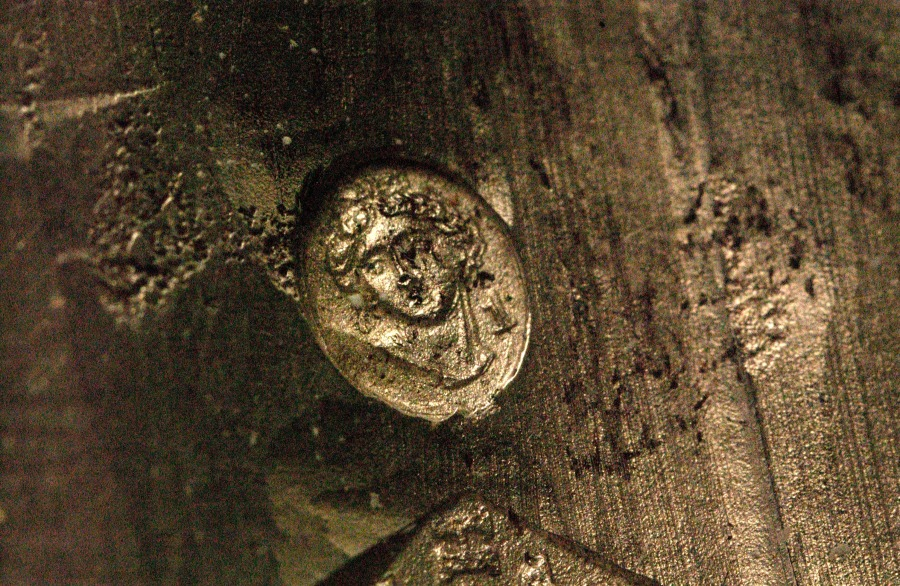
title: Covered Tureen on Stand (Pot à oille)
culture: France, late 18th-early 19th Century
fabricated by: Henry Auguste (French, 1759–1816)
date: 1797–98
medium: silver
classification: Silver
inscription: [Coat-of-arms of Amoral don Federico Carlos Gravina on bowl; cover; stand]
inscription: [Assay mark for large-sized work, 1798-1809, lining exterior; tureen foot exterior]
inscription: [Assay mark for medium-sized work, 1798-1809, beneath stand foot; on edge of cover]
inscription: [Maker's mark of Henri Auguste, master silversmith in 1785, beneath tureen foot; beneath stand foot; inside stand foot edge]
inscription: [Official assay mark for first standard silver, Paris, 1798-1809, beneath stand foot; lining exterior; on cover]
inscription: [Official mark for silver imported from countries with customs conventions, 1838-1912, beneath stand foot; edge of cover; tureen lip exterior; lining exterior; on one tureen handle; outside stand foot; tureen foot exterior]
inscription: [Unknown mark, possibly Ceres' profile in square with "E" and "7", beneath stand foot; on cover; rim of lining; tureen foot exterior; tureen lip exterior]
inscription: [Unofficial assay mark for first standard silver, Paris, 1794-1797, beneath foot stand; beneath tureen foot; near tureen handle exterior]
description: This pot-à-oille was designed by master goldsmith Henri Auguste after drawings by draftsman and sculptor Jean Guillaume Moitte. Though many of the neoclassical decorative elements on this piece are pulled from Moitte’s design, Auguste’s final product leaves out much of the proposed ornamentation. Instead this object finds distinction in its large size and smooth expanses of silver that emphasize the purity of its lines.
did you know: The coat of arms on the body of the work corresponds to the family of Federico Carlos Gravina, a Sicilian-Spanish admiral who was known to have had a close diplomatic relationship with Napoleon I.